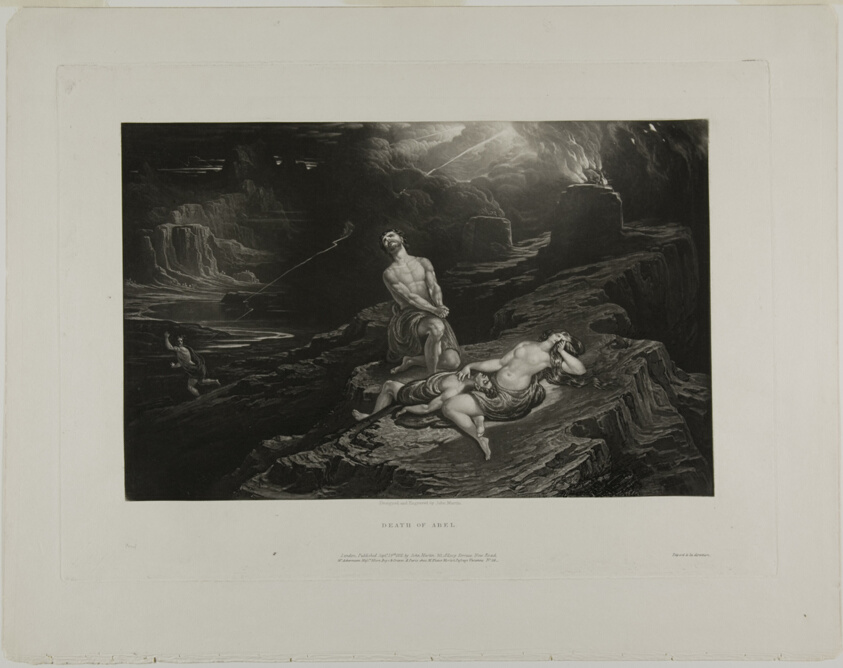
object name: Print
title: The Death of Abel, from Illustrations of the Bible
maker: John Martin (English, 1789-1854)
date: 1831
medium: Mezzotint in black on ivory wove paper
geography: England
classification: mezzotint; print; prints and drawing